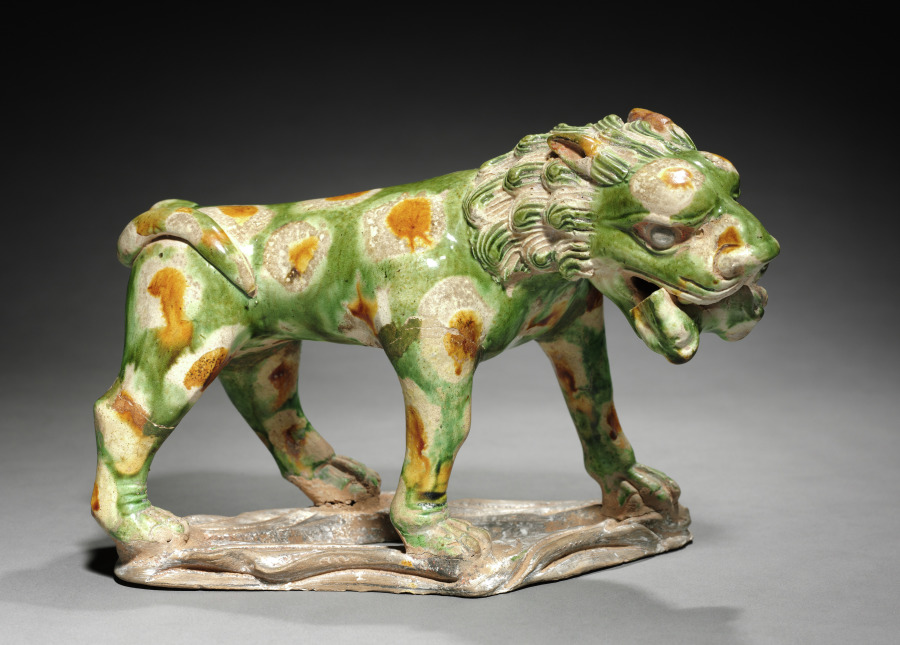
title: Lion with Cub in Mouth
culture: China, Tang dynasty (618-907)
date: 618–907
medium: earthenware with polychrome glaze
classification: Sculpture